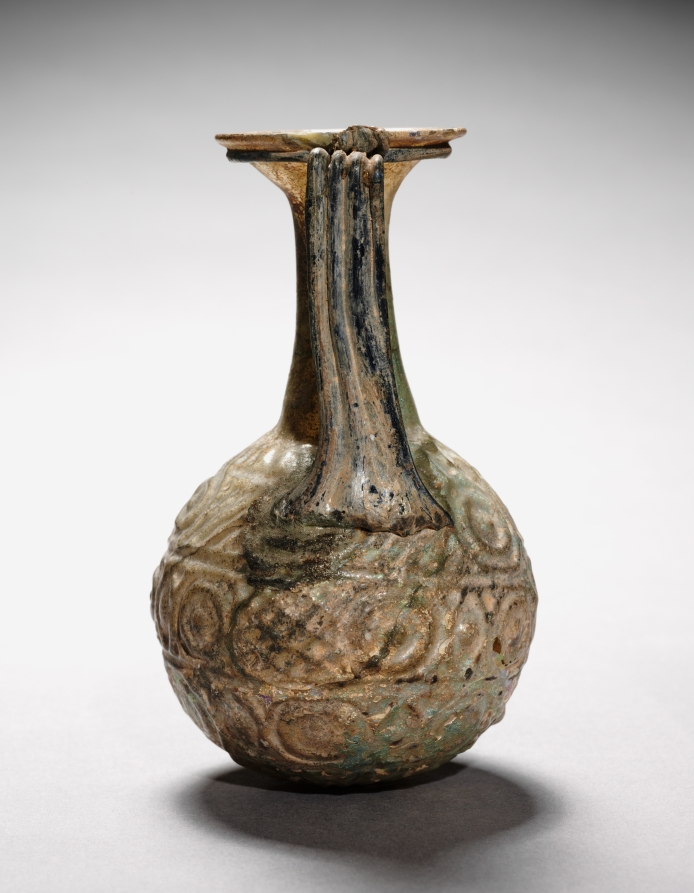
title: Pitcher with Handle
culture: Roman, Syro-Palestinian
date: 300s CE or later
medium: glass, mold-blown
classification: Glass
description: Featuring a globular mold-made body with three bands of geometric ornament (mostly concentric circles) in low relief, this pitcher could have been used for pouring water, wine, or other liquids. The separately made handle, decorated with four vertical ribs, is attached below the wide mouth by means of a coil.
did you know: Even the underside of this pitcher’s base is decorated, with a mold-made sunburst pattern.